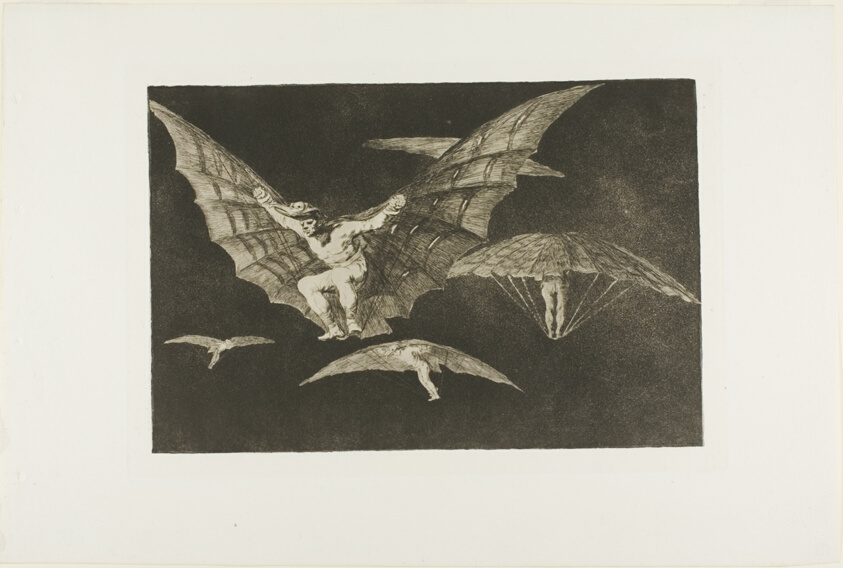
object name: Print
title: A Way of Flying, from Disparates, published as plate 13 in Los Proverbios (Proverbs)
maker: Francisco José de Goya y Lucientes (Spanish, 1746-1828); published by the Royal Academy of Fine Arts of San Fernando (Spanish, founded 1744)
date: 1815–17, published 1864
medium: Etching and aquatint in brown-black on ivory wove paper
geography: Spain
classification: etching; print; prints and drawing